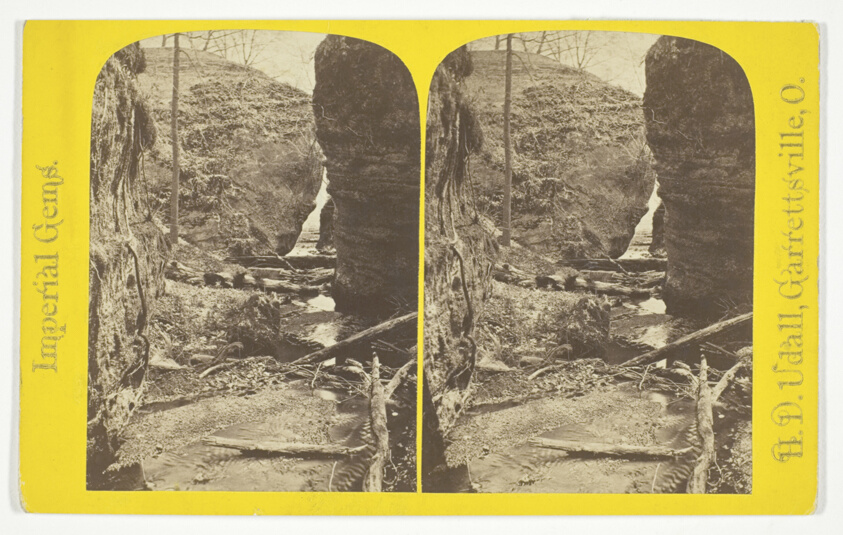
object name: Photograph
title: Ante-Chamber, Looking East, No. 31 from the series "Imperial Gems"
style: 19th century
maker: H. D. Udall; American, active late 19th century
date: 1875/99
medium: Albumen print, stereo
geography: Ohio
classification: photography; photograph